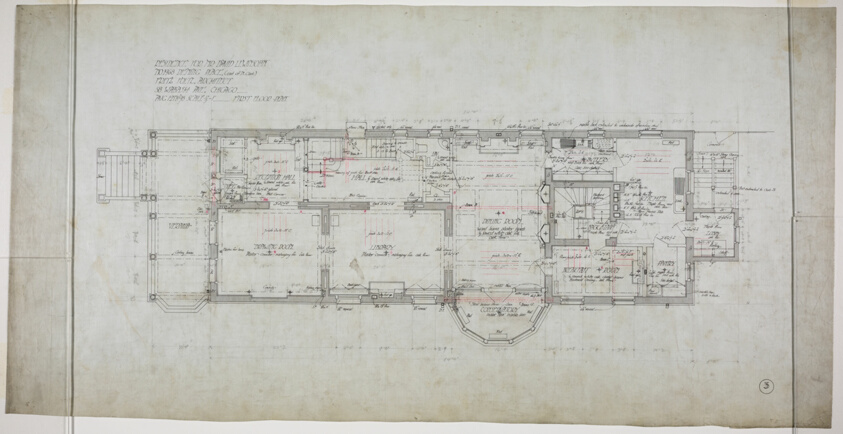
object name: Architectural Drawing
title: David Lewinsohn House, Chicago, Illinois, First Floor Plan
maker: Fritz Frederick L. Foltz (American, born Germany, 1843–1915)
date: 1898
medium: Ink on linen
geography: Chicago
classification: working drawing; architectural drawing